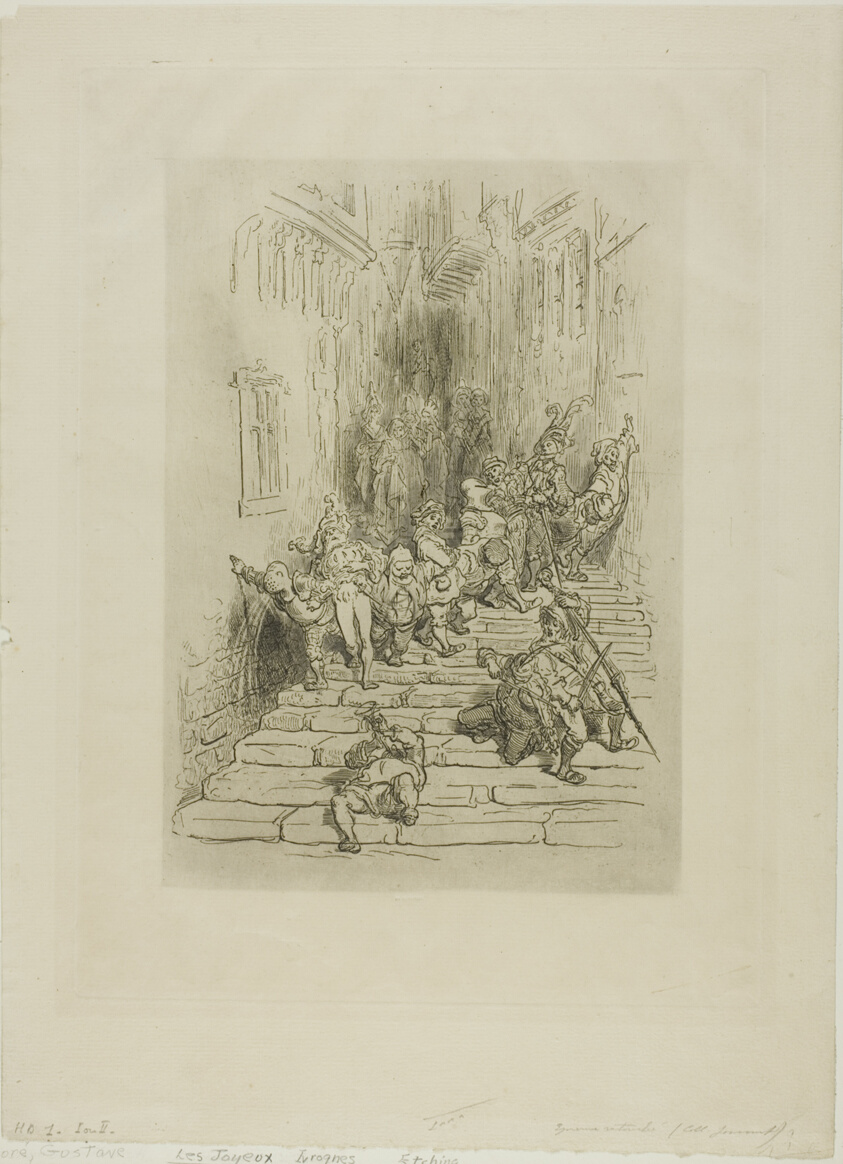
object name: Print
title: The Happy Drunkards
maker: Gustave Doré (French, 1832-1883)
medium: Etching and plate tone on cream wove paper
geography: France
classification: etching; print; prints and drawing